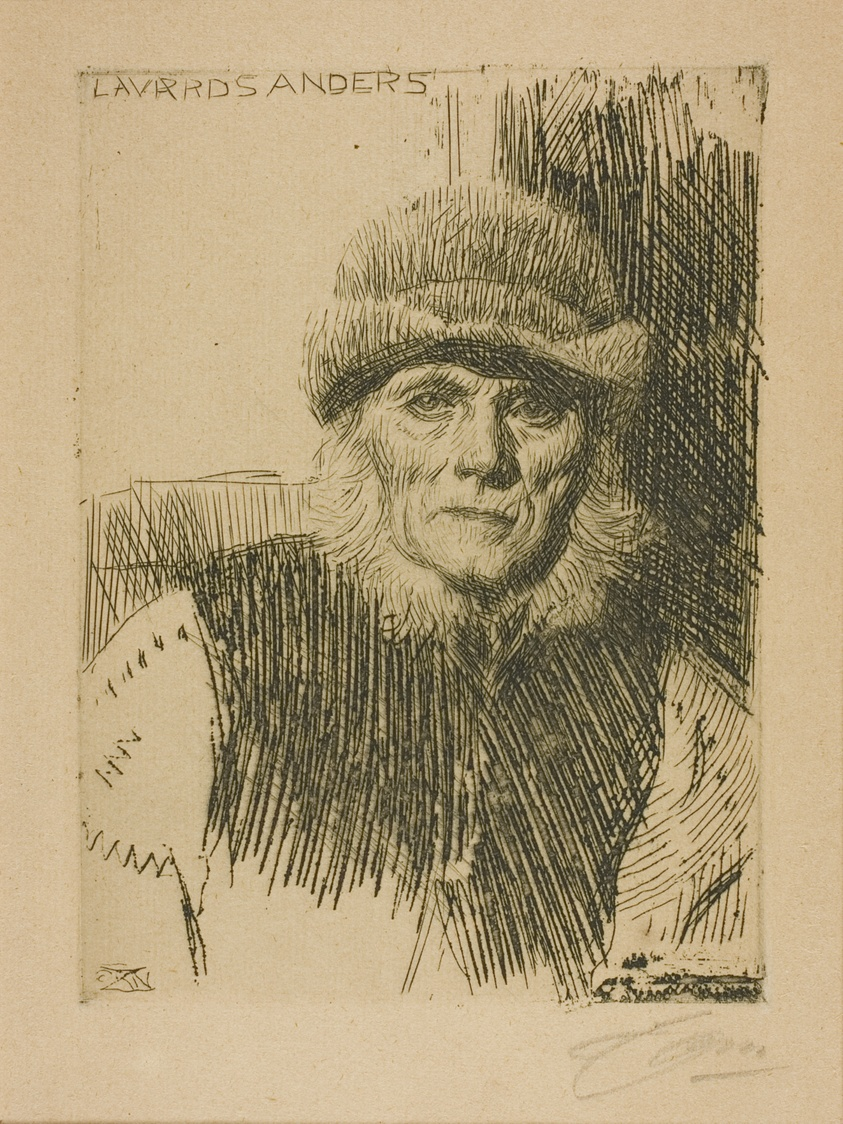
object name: Print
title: Dalecarlian Peasant (Lavards Anders)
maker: Anders Zorn (Swedish, 1860-1920)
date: 1919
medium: Etching on tan laid paper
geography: Sweden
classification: etching; print; prints and drawing